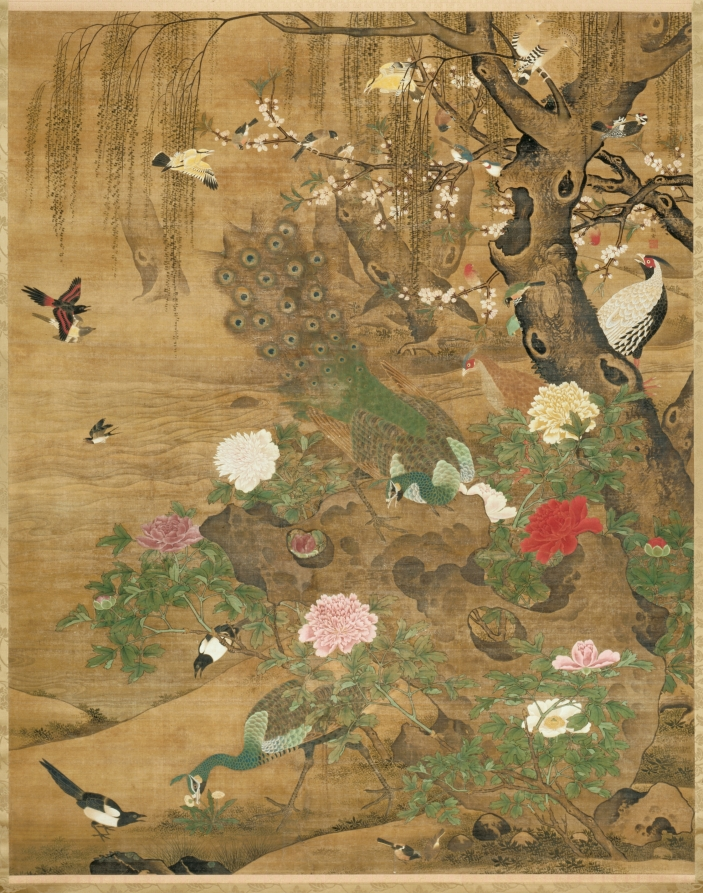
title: Birds Gather under the Spring Willow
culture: China, Ming dynasty (1368–1644)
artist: Yin Hong (Chinese, c. 1430-c. 1500)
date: late 1400s-early 1500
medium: hanging scroll, ink and color on silk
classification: Painting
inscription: 殷宏. [印]金臺世家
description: This scroll depicts a spring scene with all kinds of birds, including one peacock with a hen among peonies. The painting is one of four surviving works by Yin Hong bearing his signature and seals. Some scholars debate whether this work depicts the theme “One Hundred Birds admiring the Phoenix,” a metaphor for human society presenting an idealized hierarchy under imperial rule; other scholars argue that peafowls, as exotic birds not native to China, would not be depicted to represent the emperor. This large painting might have been hung in a palace hall and may have been part of a set depicting the four seasons.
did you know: The peahen is plucking a dandelion.